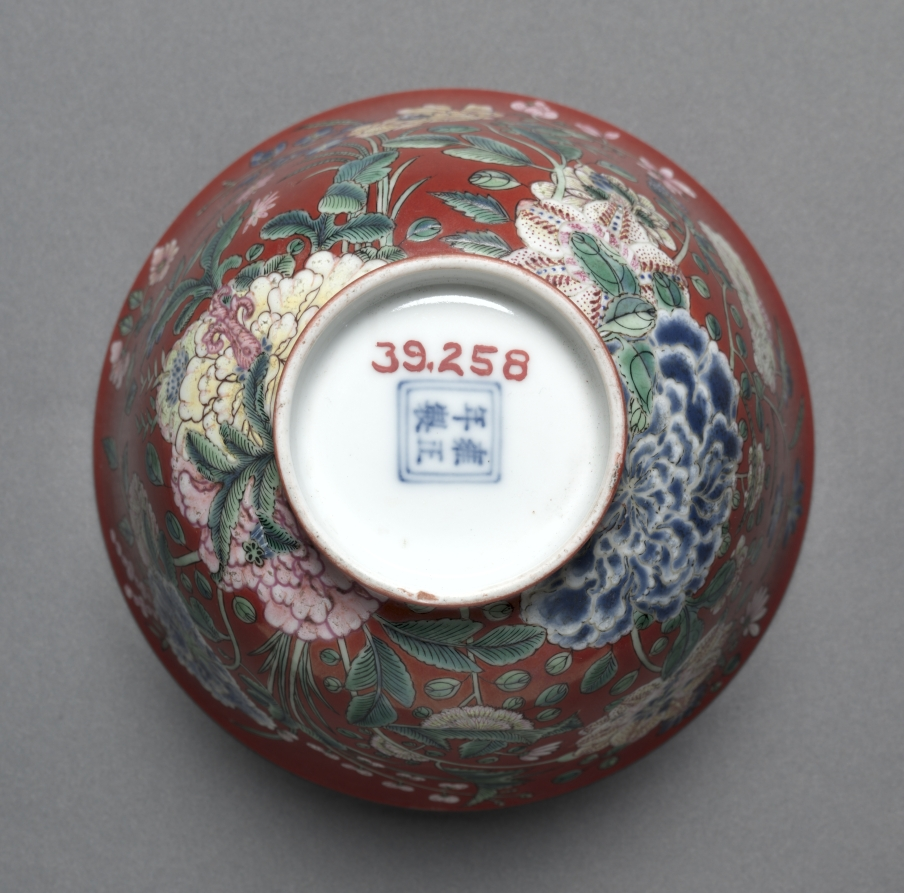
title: Bowl with Flowering Plants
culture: China, Jiangxi province, Jingdezhen, Qing dynasty (1644–1911), Yongzheng mark and reign (1723–35)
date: 1723–35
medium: porcelain with overglaze enamel decoration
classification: Ceramic